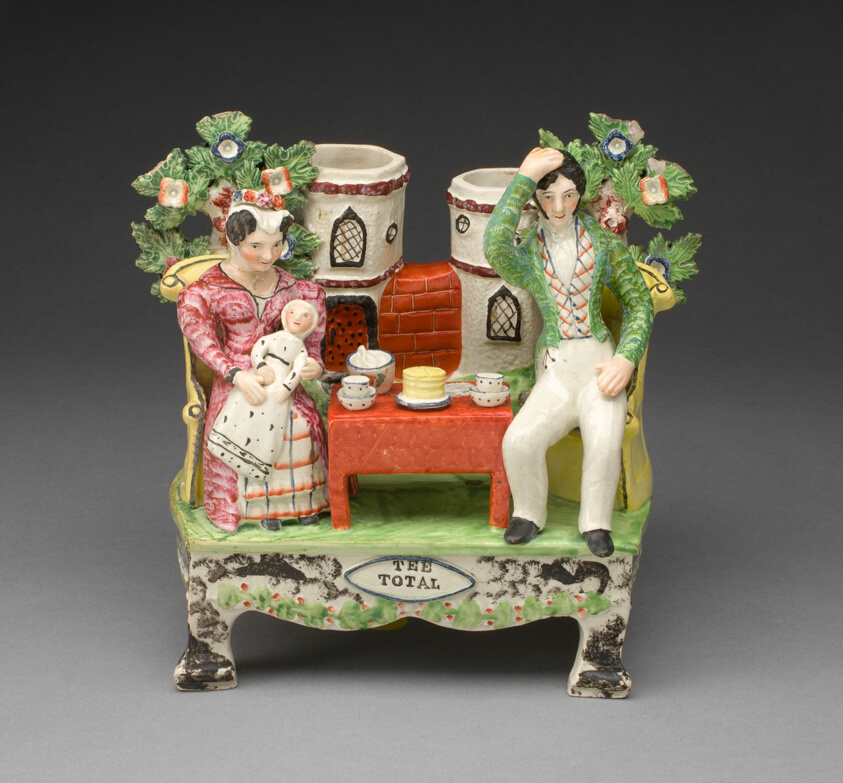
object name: Ceramics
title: Chimney Ornament: Tee Total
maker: England, Staffordshire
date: c. 1820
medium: Glazed earthenware with polychrome enamel decoration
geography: Staffordshire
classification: earthenware; ceramics; european decorative arts